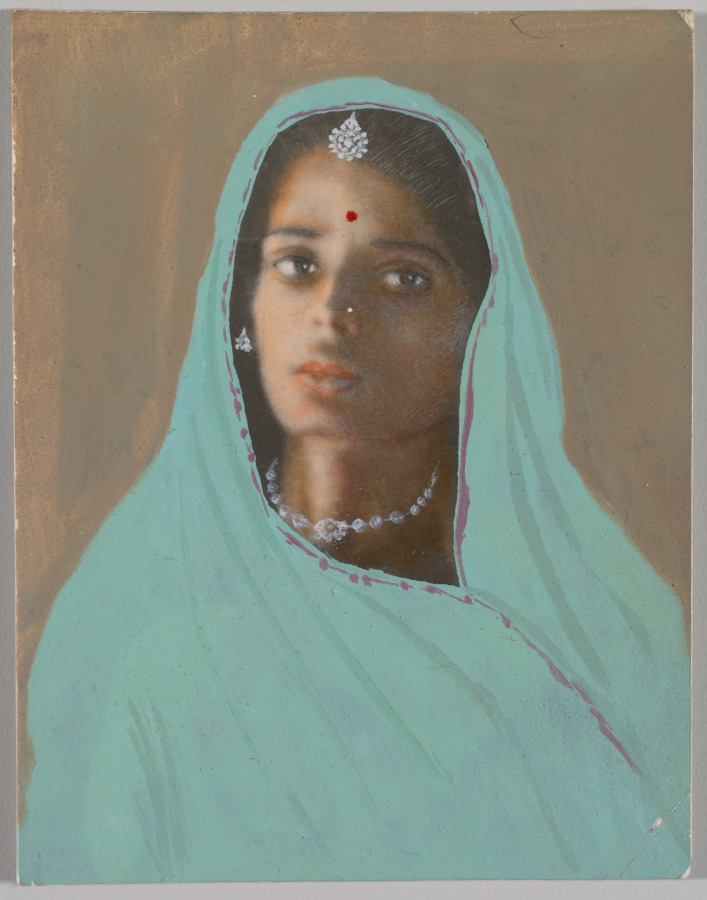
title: Untitled (Portrait of a Woman in Blue Sari and Veil)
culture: India, 20th century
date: 1900–2000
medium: gelatin silver print, hand-colored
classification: Photograph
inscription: Written in blue ink on white adhesive label on verso: €180